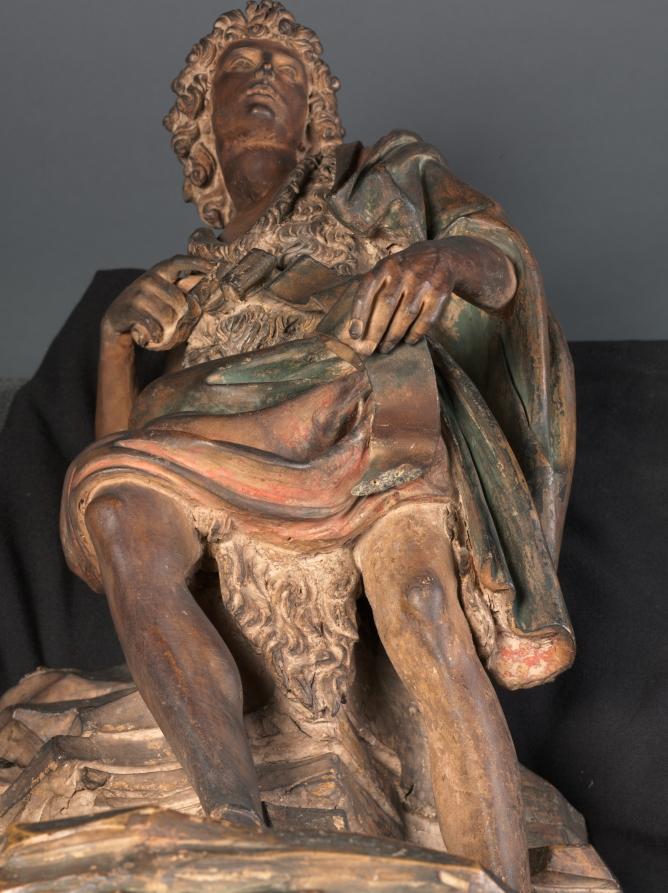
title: Saint John the Baptist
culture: Italy, Florence, 16th century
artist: Master of the Saint John Statuettes (Italian)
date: c. 1500–1525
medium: terracotta with traces of polychromy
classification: Sculpture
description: This statuette belongs to a group of terracotta sculptures representing David (from the OldTestament) and Saint John (from the New Testament) produced by a still unidentified Florentine artist and his studio in the late 1400s and early 1500s. Giventheir scale, it seems likely that these sculptures were intended for use in private homes rather than churches.